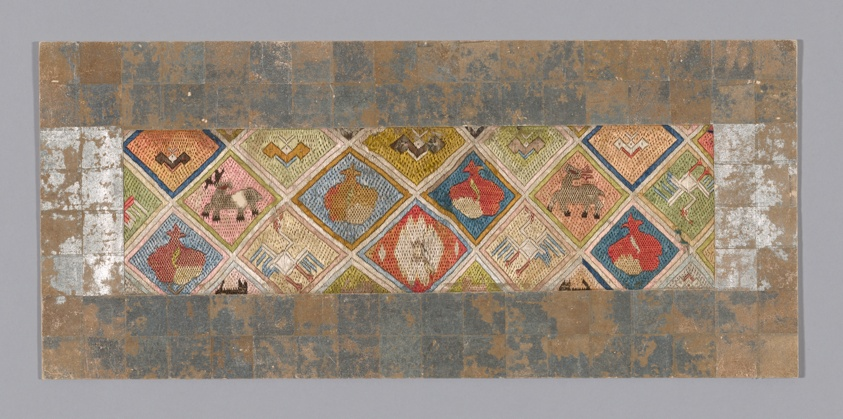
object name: Textile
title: Panel (Dress Fabric)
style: qing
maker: Han-Chinese (China)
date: Qing dynasty (1644–1911), 1875/1900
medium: embroidered on gauze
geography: China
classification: textile; embroidery; weaving